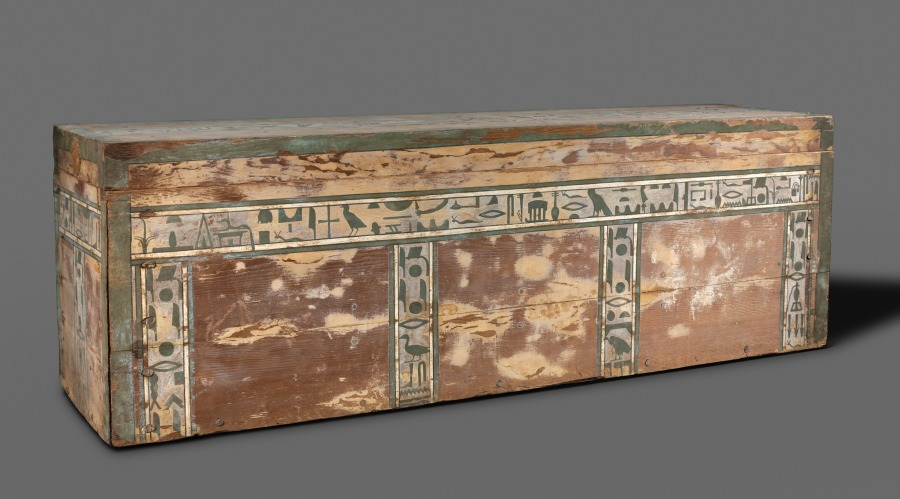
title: Coffin of Senbi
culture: Egypt, Meir, Middle Kingdom, mid-Dynasty 12, reign of Amenemhat II to Sesostris III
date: c. 1918–1859 BCE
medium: gessoed and painted cedar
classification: Funerary Equipment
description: The most common type of coffin during the Middle Kingdom took the shape of a rectangular box with lid. The mummy inside was placed on his left side, facing east, his head behind the two magical eyes. These—in the shape of human eyes, to which have been added the markings of a falcon's head—were supposed to enable him to behold the rising sun, reborn daily. The long horizontal inscriptions are prayers to Anubis (god of embalming) and Osiris (god of the dead) for offerings of food and drink and other items necessary for survival in the afterlife. The short vertical inscriptions place him under the protection of the gods of earth, sky, air, and moisture, as well as various funerary deities.